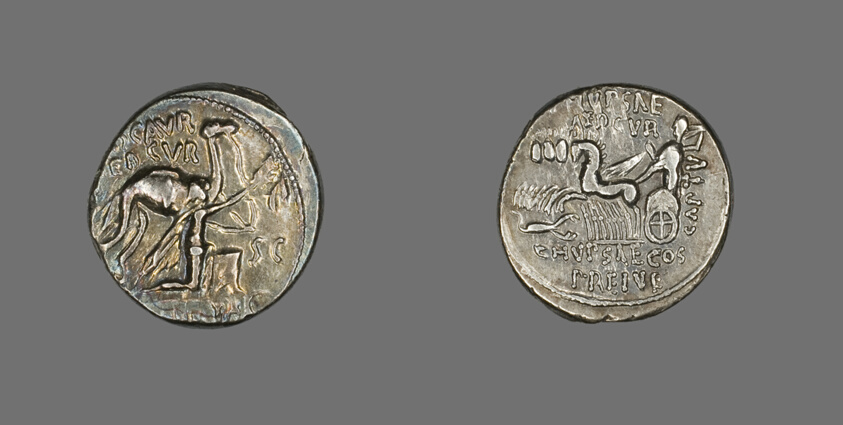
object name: Coin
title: Denarius (Coin) Portraying King Aretas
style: roman (ancient, style or period)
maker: Roman, minted in Rome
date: 58 BCE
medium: Silver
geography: Roman Empire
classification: coin; ancient art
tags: Chariots